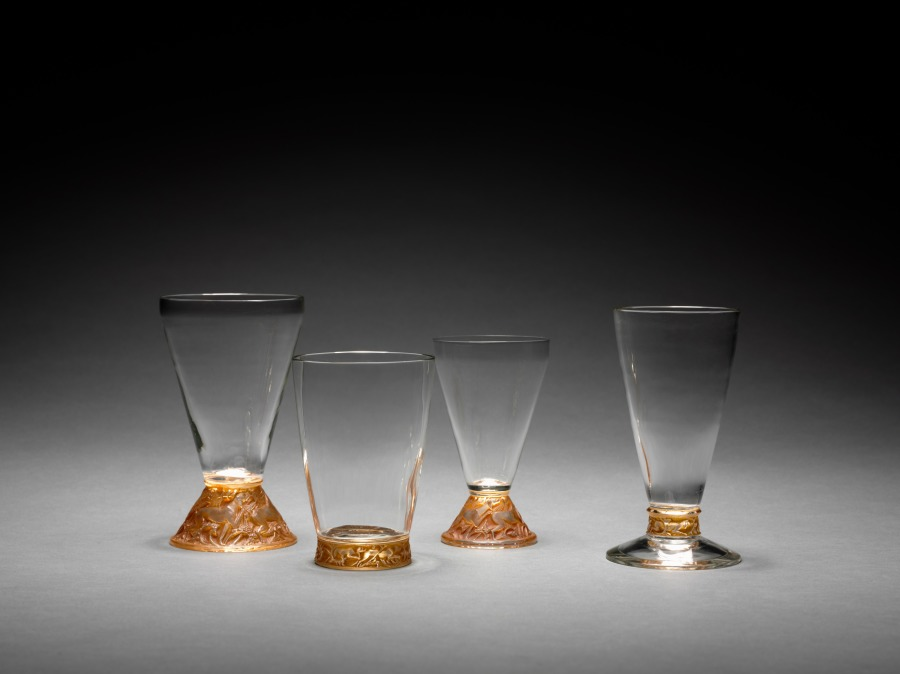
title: Ring of Dogs Water Gobelet (Gobelet bague chiens)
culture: France, 20th century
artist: René Lalique (French, 1860–1945)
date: c. 1913–21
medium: glass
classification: Glass